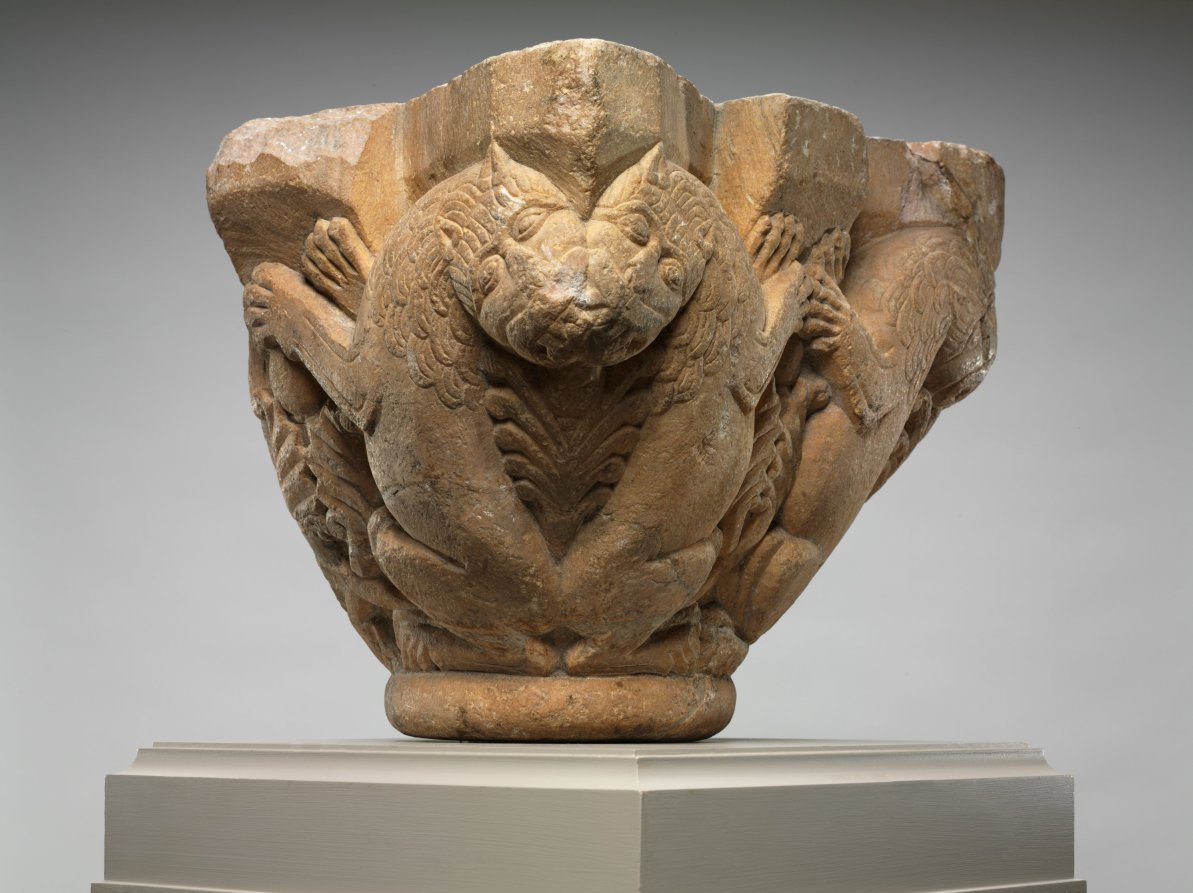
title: Engaged Capital with Lions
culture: Northern Spain (Navarre ?) or Southwest France (Pyrénées or Roussillon ?), mid-12th century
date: 1145–64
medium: marble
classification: Sculpture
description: The compositional motif of confronted and addorsed beasts illustrated on this capital was especially popular in churches along the pilgrimage roads.